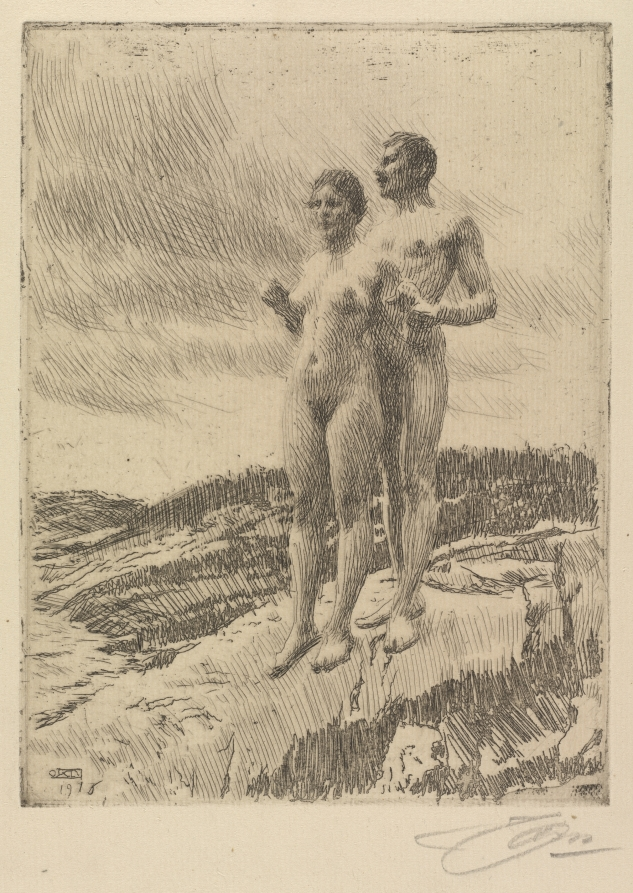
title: The Two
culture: Sweden, 20th century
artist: Anders Zorn (Swedish, 1860–1920)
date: 1916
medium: etching and drypoint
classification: Print